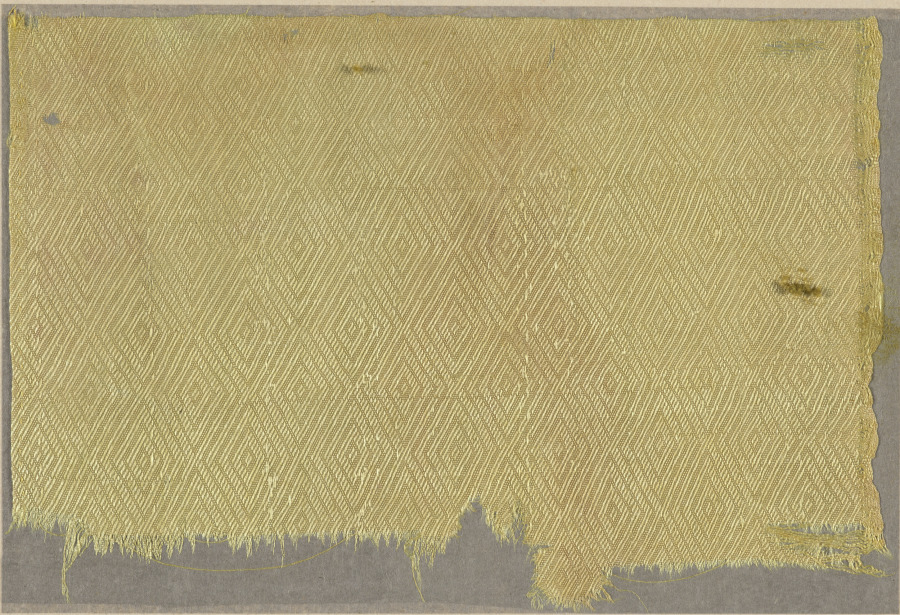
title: Fragment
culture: China, 8th century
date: 700s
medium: tabby ground and twill pattern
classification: Textile